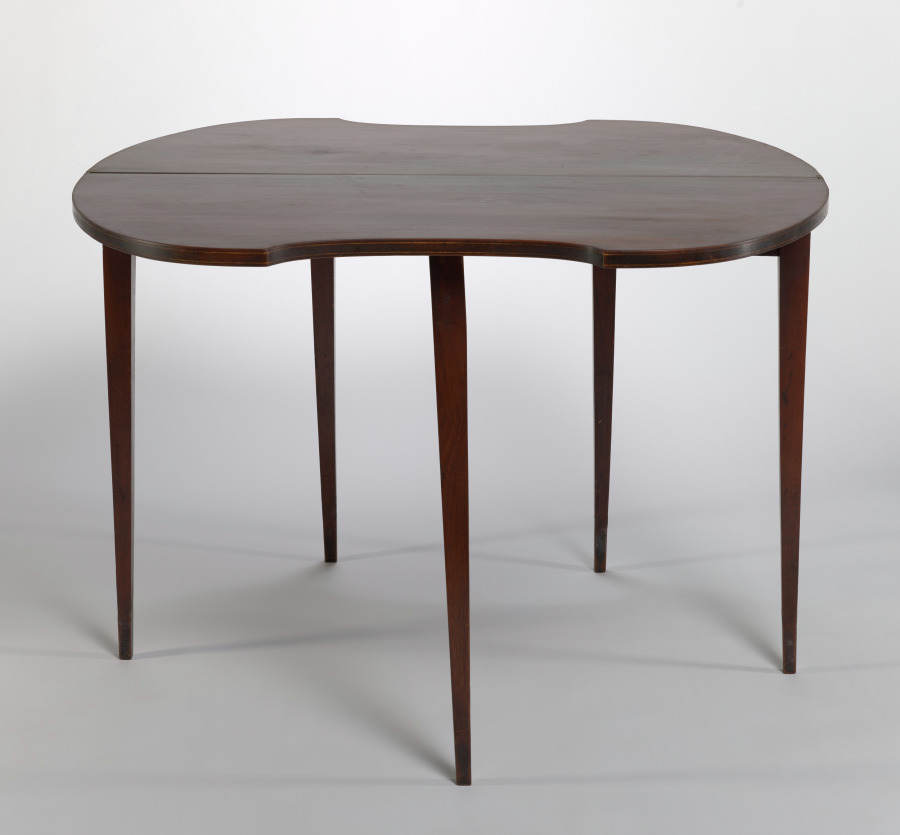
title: Game Table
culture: America, Maryland, Baltimore, early 19th Century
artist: style of George Hepplewhite (American, 1786)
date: c. 1800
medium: mahogany with inlays of various woods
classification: Furniture and woodwork